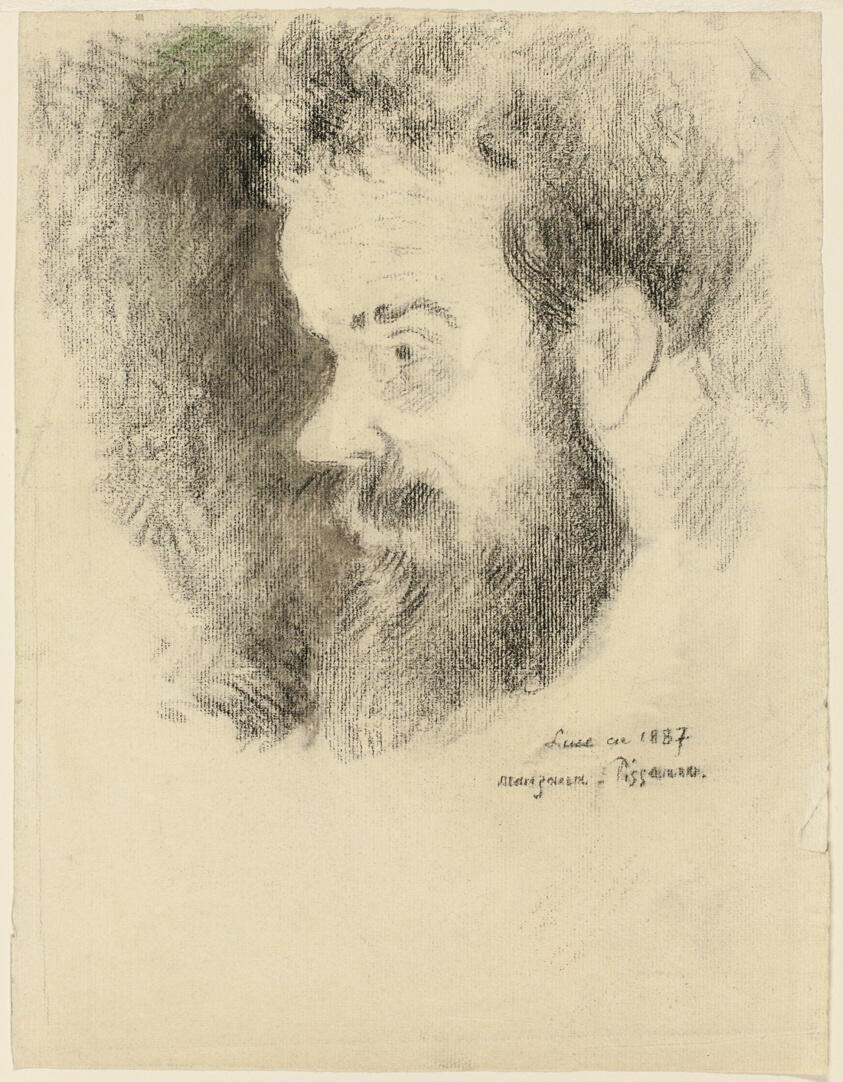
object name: Drawing and Watercolor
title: Portrait of Maximillian Luce in 1887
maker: Georges Manzana-Pissarro (French, 1871–1961)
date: 1887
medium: Charcoal and fabricated charcoal, with touches of green pastel and traces of red pastel, stumped and erased, on cream laid paper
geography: France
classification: charcoal; paper; prints and drawing